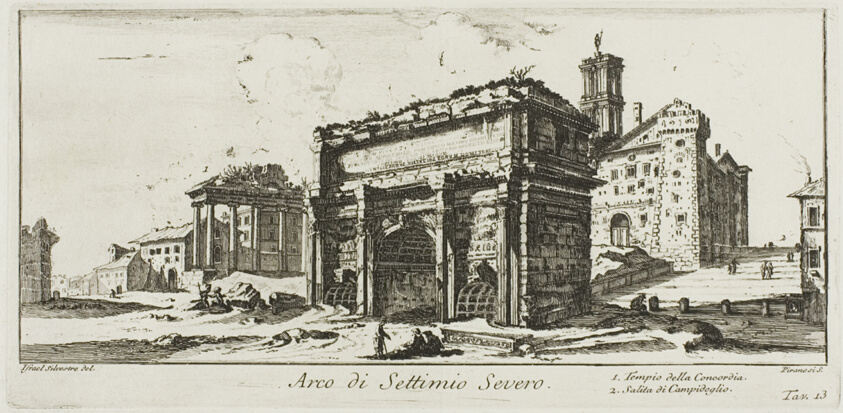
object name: Print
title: Arch of Septimius Severus. 1. Temple of Concord. 2. Ascent to the Capitoline Hill, plate 13 from Some Views of Triumphal Arches and other Monuments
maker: Giovanni Battista Piranesi (Italian, 1720-1778)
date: 1748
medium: Etching on ivory laid paper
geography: Italy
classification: etching; print; prints and drawing